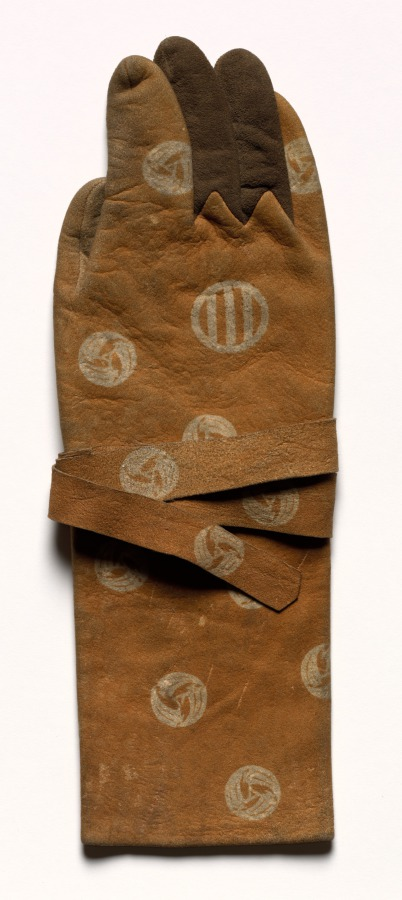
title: Archer's Glove (right)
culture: Japan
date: 1800s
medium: chamois leather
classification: Garment